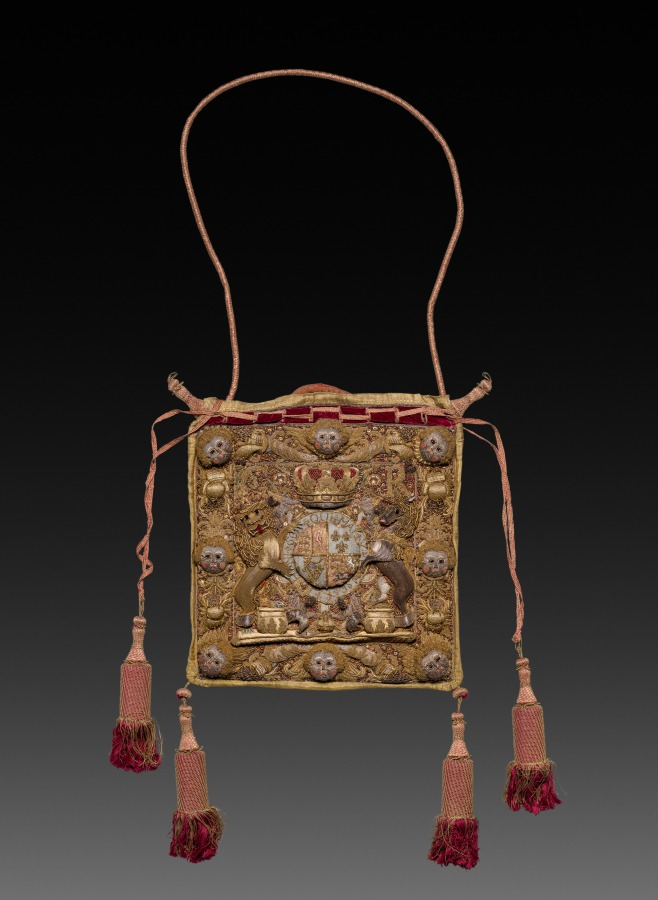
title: Lord Chancellor's Burse (Purse) with Royal Cypher and Coat of Arms of George III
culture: England, 18th century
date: 1760–1801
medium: Red silk velvet, silk embroidery, goldwork, pearls, black beads, sequins, pendant tassels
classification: Velvet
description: A richly decorated burse (purse) to hold the monarch's Great Seal of the Realm has a traditional role in the opening of parliament. The safekeeping of the seal was the responsibility of the Keeper of the Great Seal, an office later incorporated into the role of Lord Chancellor. Because the Great Seal was attached to all major documents of state, it was the ultimate symbol of royal authority. The use of a special burse to hold the seal can be traced back to the end of the 13th century. By the end of the 16th century, the burse had evolved into the highly decorated, professional work of embroidery seen in this object. It includes the lion and unicorn surrounding the royal crest and is made from crimson velvet. Burses were replaced annually; it being a "perk" of office that the Lord Chancellor and Keeper of the Great Seal was allowed to keep the fragments of the old seal and accompanying burse. Portraits of Lord Chancellors, from the Tudor period onward, depict them with their burse. Cleveland’s collection includes one such portrait by American artist Gilbert Stuart (1755–1828) of Irish Lord Chancellor John FitzGibbon, 1st Earl of Clare (1748–1802) who was Lord Chancellor from 1789 to 1802. Baron FitzGibbon’s portrait (1919.910) is on view in gallery 204.